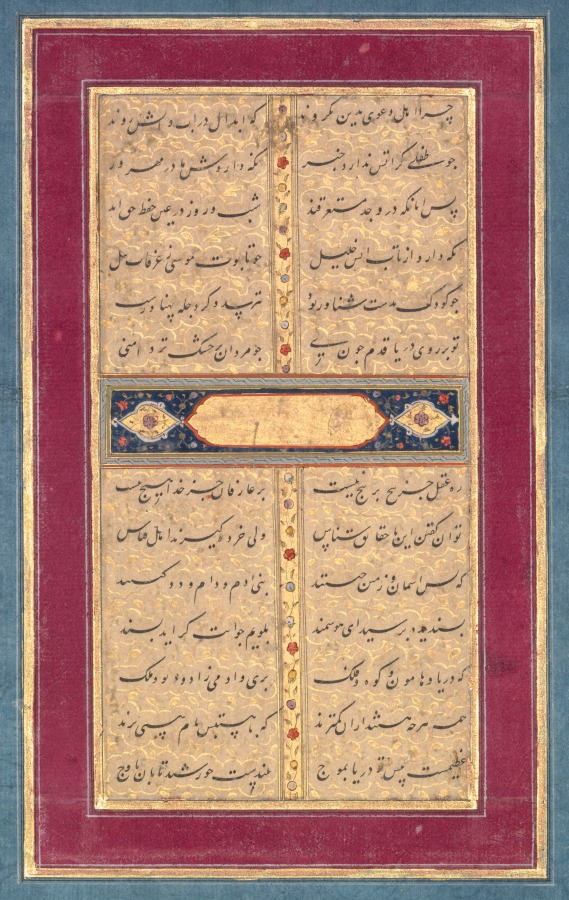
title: Calligraphy: A Page of Text from Sadi's Bustan (verso)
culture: Mughal India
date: c. 1710–20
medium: Gum tempera, ink, and gold on paper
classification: Calligraphy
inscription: Verso: From a Bustan (Fragrant Herb Garden) of Sa‘di (Persian, 1210–1291). Persian text in nasta‘liq script: Why do the adherents of Idea to this not cleave—/ That only the Elect may go in water or in fire?/ As for the infant, uninformed of fire,/ Does not his mother guard him lovingly?/ Those, then, who’re drowned in ecstasy/ By night and day are in the very care of Truth:/ He guards the Friend against the fire’s heat/ As Moses’s crib against the whirlpools of the Nile;/ When an infant’s in a swimmer’s arms/ He knows no fear, broad though the Tigris be;/ But how shall you step on the ocean’s face/ As do real men, when even on dry land your skirt is wet?/ The way of the intellect is all twists and turns,/ But the concern of the gnostics is for God alone!/ This can be said to those who recognize realities,/ Though adherents of analogy may carp thereat and say:/ “What, then, is heaven, and what earth besides?/ Who are the sons of Adam, and the beasts both wild and tame?”/ A proper thing you’ve asked, O prudent one!/ I’ll tell you—if you find the answer proper:/ The plain and the ocean, the mountain and the sky,/ Pari and manchild, demon and angel—/ All, whatsoever they be, are less than That/ By virtue of Whose being they utter being’s name!/ Monstrous before you, with its waves, lies the ocean;/ High is the sun, all ablaze at the zenith; (after Wickens 1974, 113)